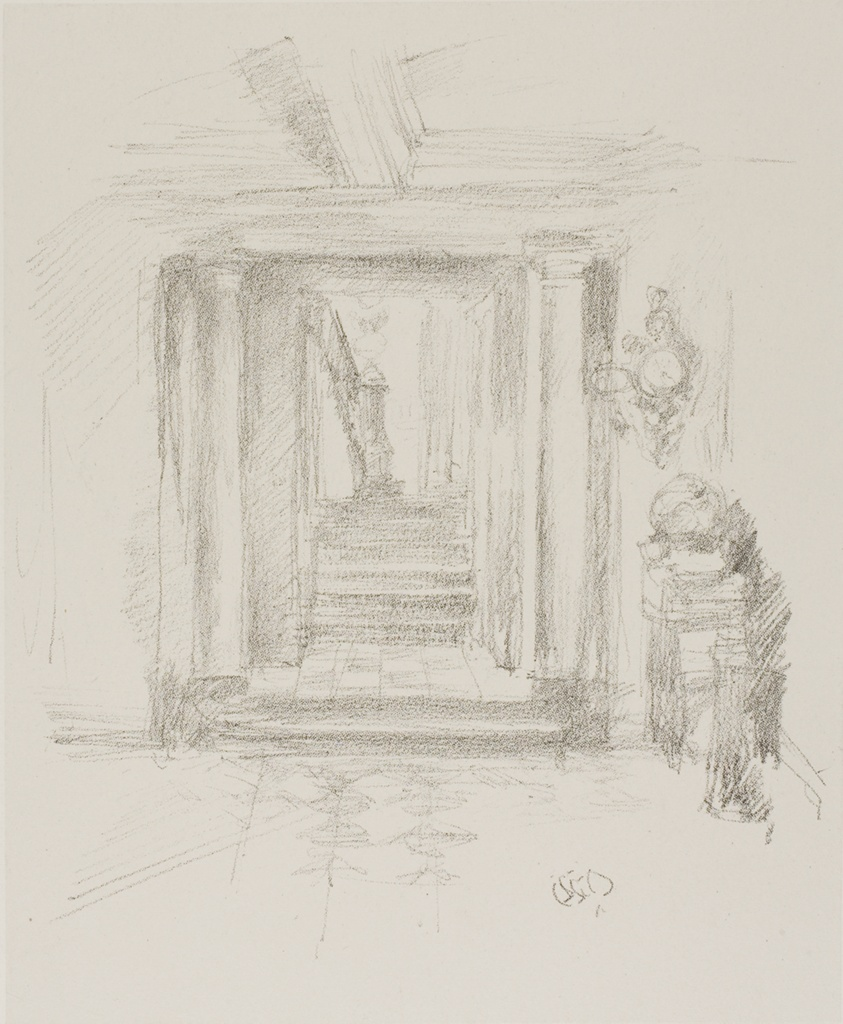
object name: Print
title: Staircase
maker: James McNeill Whistler (American, 1834-1903)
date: 1891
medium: Transfer lithograph in black on grayish white chine, laid down on ivory plate paper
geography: United States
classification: transfer lithograph; lithograph; print; prints and drawing; paper